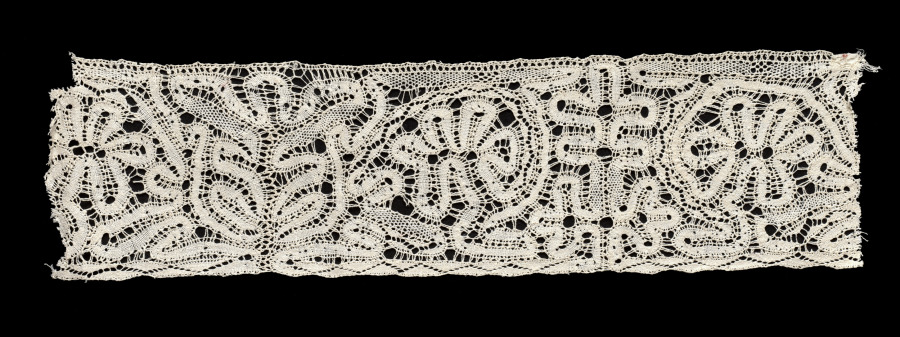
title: Lace Edging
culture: Flanders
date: 1600s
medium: Linen: bobbin lace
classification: Lace